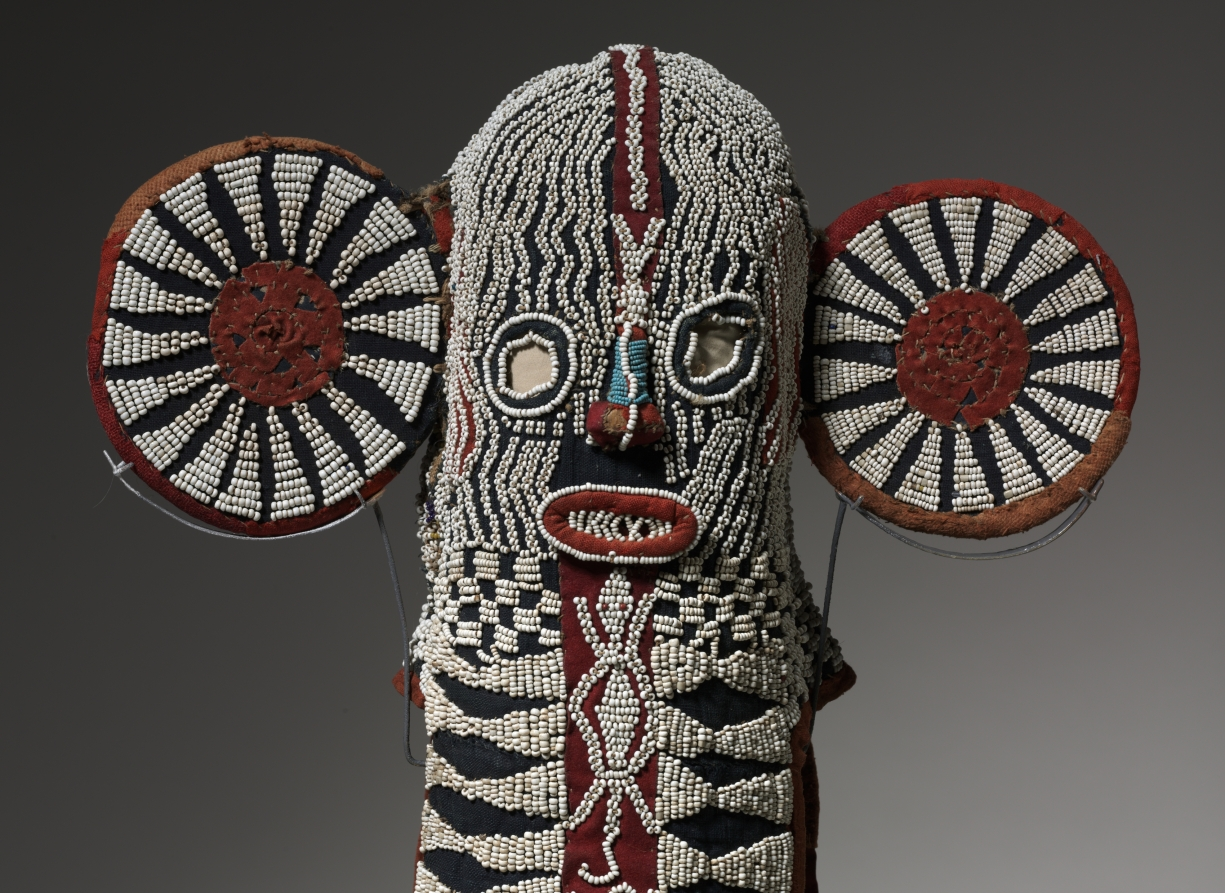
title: Mask (mbap mteng): Elephant (aka)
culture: Africa, Central Africa, Cameroon, Grassfields region, Bamileke-style maker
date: early 1900s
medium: Cotton, burlap, glass beads, twine, leather, and wood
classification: Mask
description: The name given to masks like this, mbap mteng, means "animal with huge ears." In the Cameroon Grassfields kingdoms, the elephant signifies power, authority, prestige, and leadership. The colorful glass beads that decorate the mask’s surface were imported from Venice and Bohemia (in Europe) and signal wealth and prosperity. Its geometric patterns include triangles that evoke the leopard, another animal linked with royal power. Members of Kuosi, an elite male society, wore such elephant masks for ritual dances and funerary ceremonies. This mask would have been worn with a costume that included a feather headdress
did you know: Performers wore elephant masks with indigo-dyed robes, red feather headdresses, and leopard pelts. Leopards and elephants symbolized royal power.